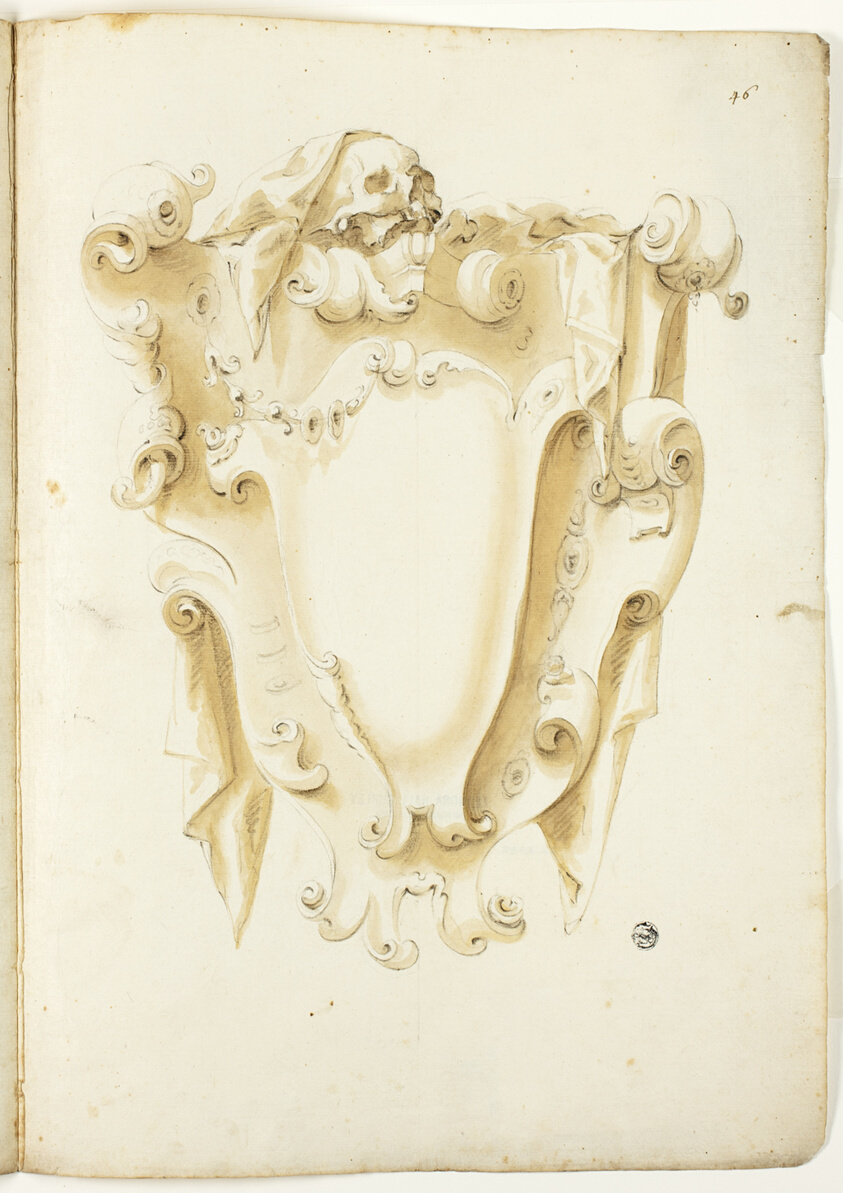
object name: Drawing and Watercolor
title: Design for Escutcheon, with Skulls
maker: Unknown Artist; possibly Italian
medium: Black chalk and brush and brown wash on ivory laid paper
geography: Italy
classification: chalk; drawings (visual works); prints and drawing